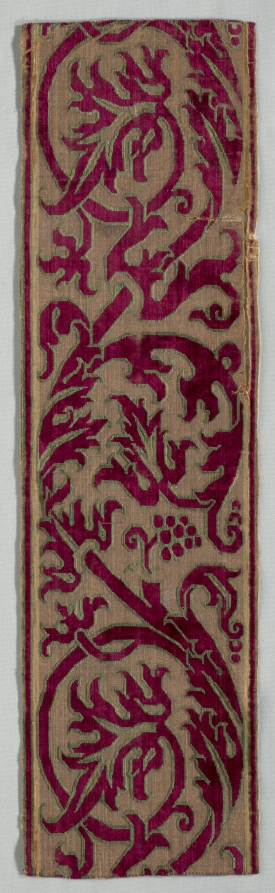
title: Border Fragment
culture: Italy, late 17th century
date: late 1600s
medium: velvet (cut and uncut); silk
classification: Velvet